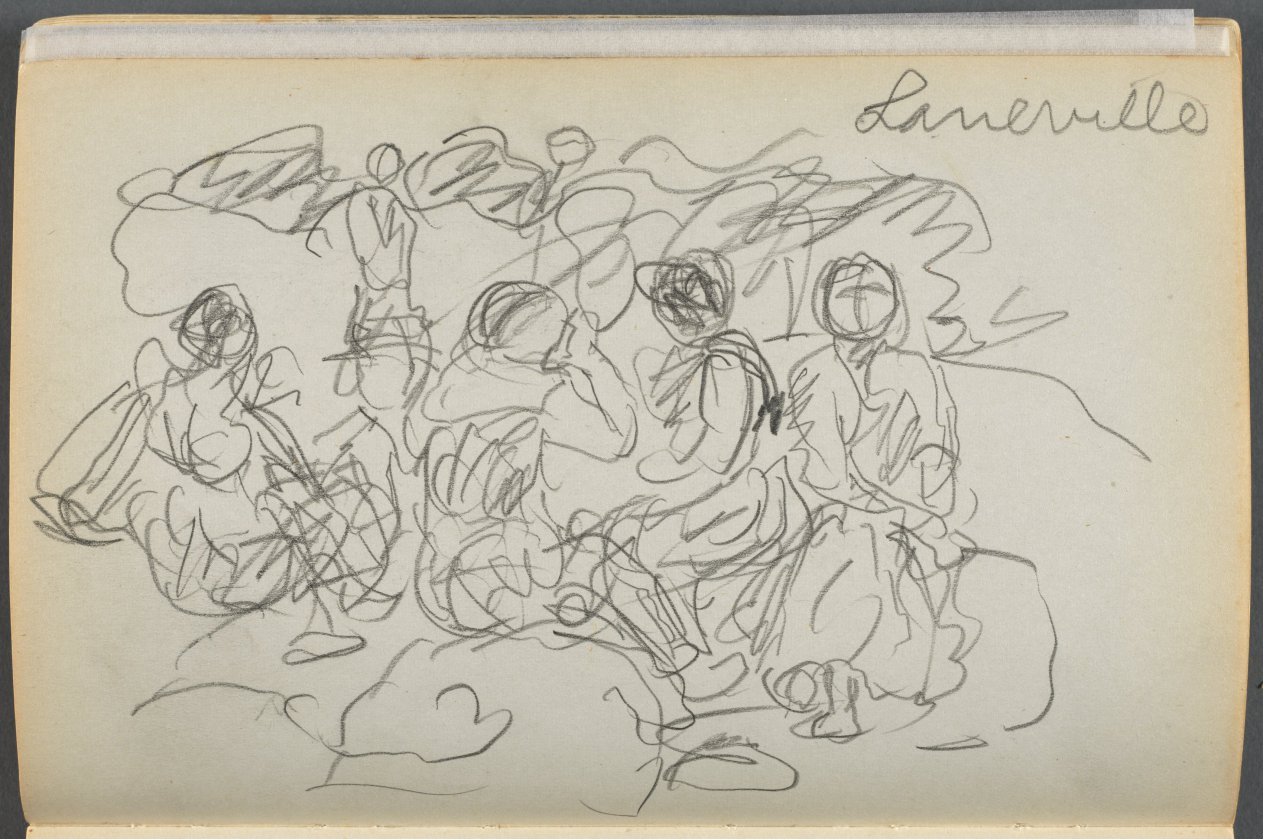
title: Sketchbook- The Granite Shore Hotel, Rockport, page 062: "Laneville"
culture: America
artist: Maurice Prendergast (American, born Newfoundland [now Canada], 1858–1924)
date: 1905–10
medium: graphite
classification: Bound Volume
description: This sketchbook contains 72 pages of pencil drawings and 9 watercolors of Cape Ann. On the inside of the cover Prendergast wrote the address of the Granite Shore Hotel in Rockport, Massachusetts.